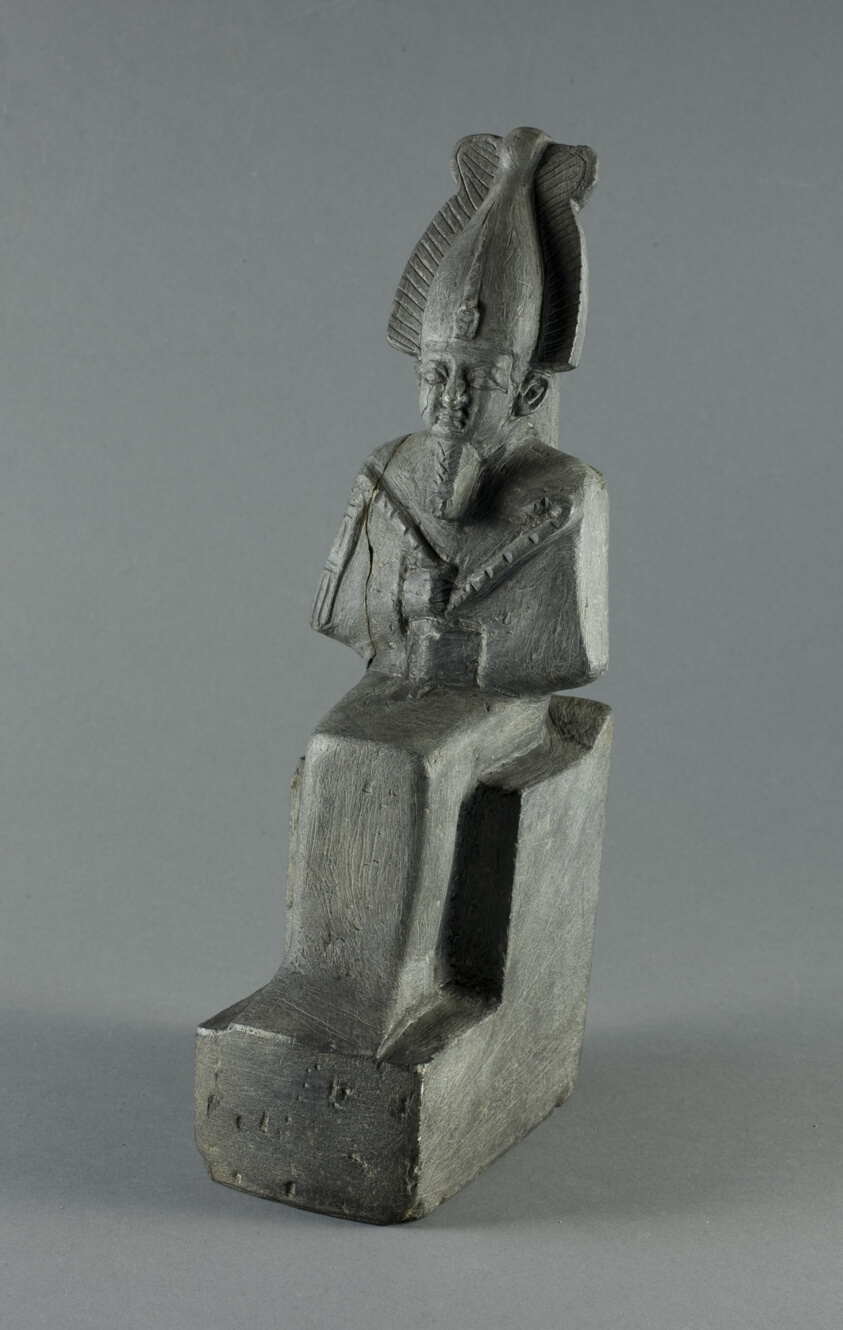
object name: Sculpture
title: Statuette of the God Osiris Seated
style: egyptian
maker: Egyptian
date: Late Period, Dynasty 26–31 (664–332 BCE)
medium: Steatite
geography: Egypt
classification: statuette; stone; sculpture; ancient art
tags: gods (deities)